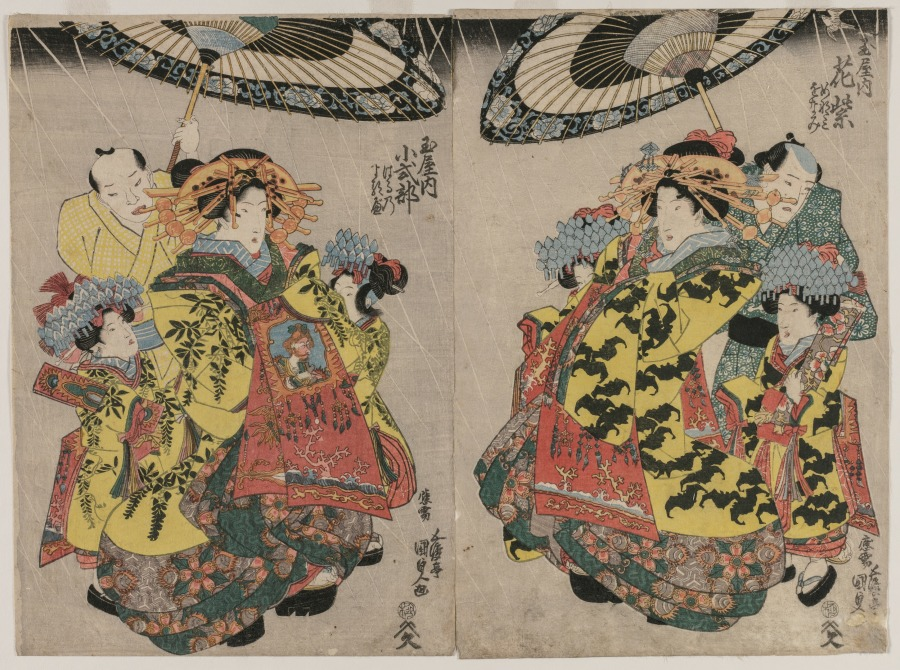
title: The Courtesans Hanamurasaki and Koshikibu of the Tamaya Promenading in the Rain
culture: Japan, Edo period (1615–1868)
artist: Utagawa Kunisada (Japanese, 1786–1865)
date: c. early 1830s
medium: color woodblock print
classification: Print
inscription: Artist's signature: Gototei Kunisada ga.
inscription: Publisher: Yamamotoya Heikichi (emblem). Censorship seal: kiwame.